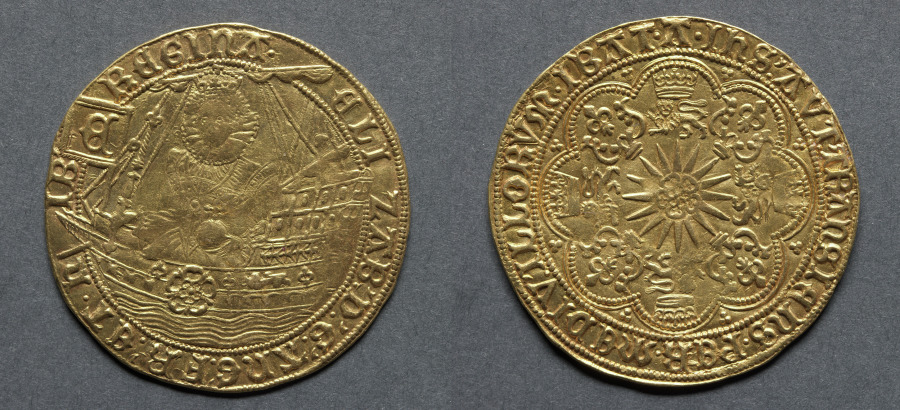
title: Ryal: Elizabeth I in Ship (obverse); Rose over Radiate Sun (reverse)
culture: England, Elizabeth I, 1558-1603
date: 1583–84/85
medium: gold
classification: Coins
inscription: ELI ZAB; D; G; ANG; FR; ET. H IB REGINA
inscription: IHS; AVT; TRANSIENS. PER. MEDIV; ILLORVM. IBAT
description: An excellent specimen of a very rare coin, the figure of the queen is full of minute detail. Elizabeth I is shown sailing on a ship; she holds an orb and scepter. A rose appears on the hull of the ship and an E on the banner located on the bow. Produced at the climax of her reign, the design was chosen to demonstrate England's superior naval power and colonization of what would become the United States of America.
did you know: The ryal, 15 shillings, was the rarest denomination and was minted in exceedingly small numbers.